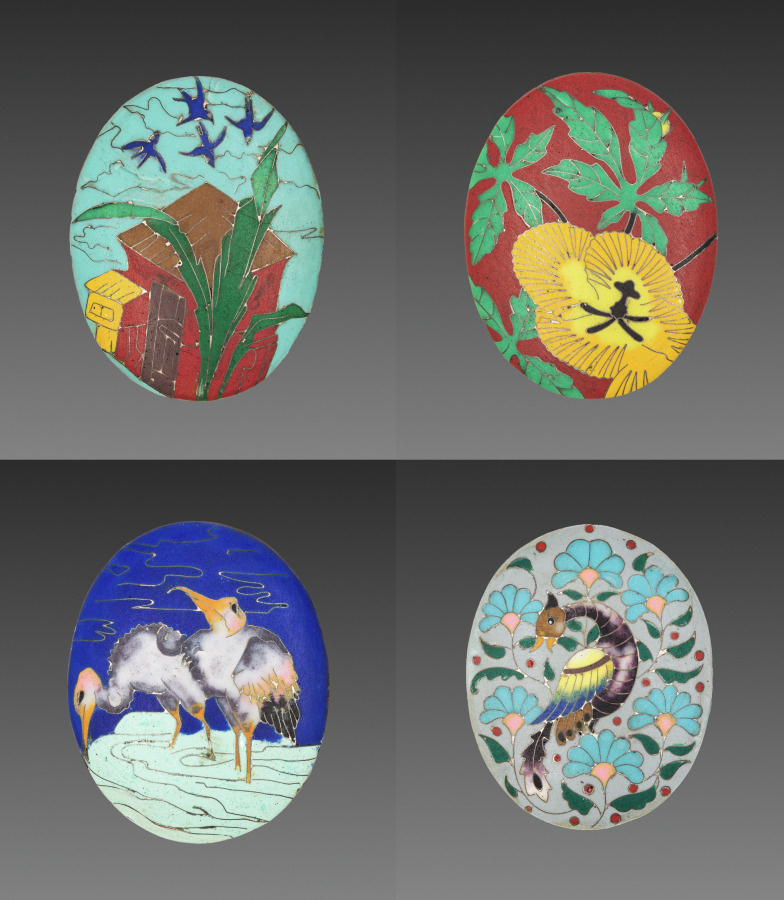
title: Set of Four Locket Panels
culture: France, 19th century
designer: Alexis Falize (French, 1811–1898)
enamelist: Antoine Tard (French, active 1860–1889)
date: 1800s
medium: gold and cloisonné enamel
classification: Jewelry